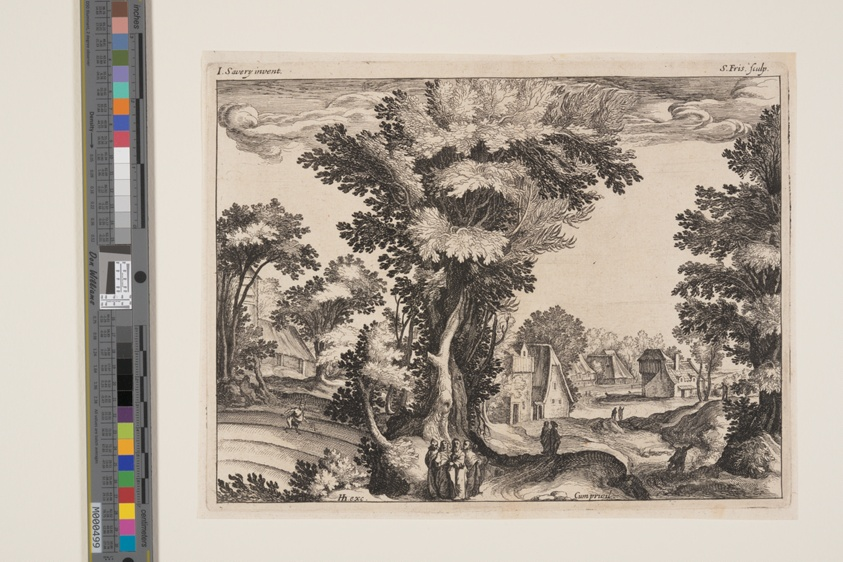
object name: Print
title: Parable of the Sower, from Landscapes with Scenes from the Life of Christ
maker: Simon Frisius (Dutch, c. 1580–1629); after Jacob Savery (Dutch, c. 1565-1603)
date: c. 1600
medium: Etching on ivory laid paper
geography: Netherlands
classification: etching; paper; print; prints and drawing